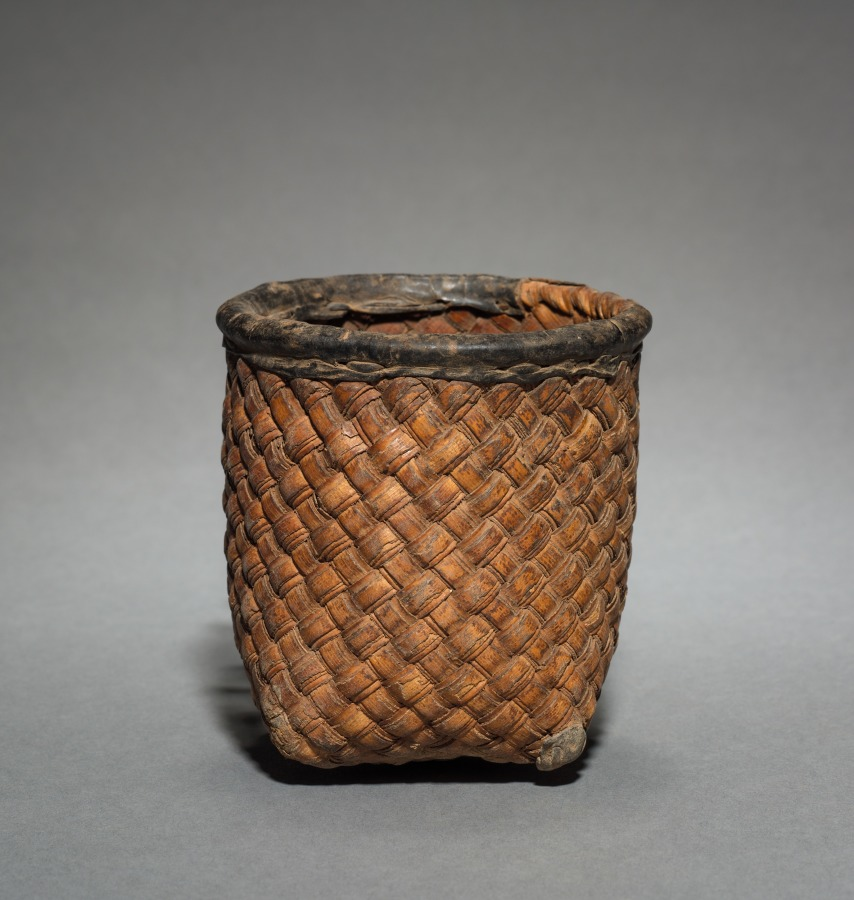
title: One of Ten Nesting Wedding Baskets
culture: Africa, Western Africa, Burkina Faso, Lobi–style maker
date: c 1900s ?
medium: Plant fiber and leather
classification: Vessels